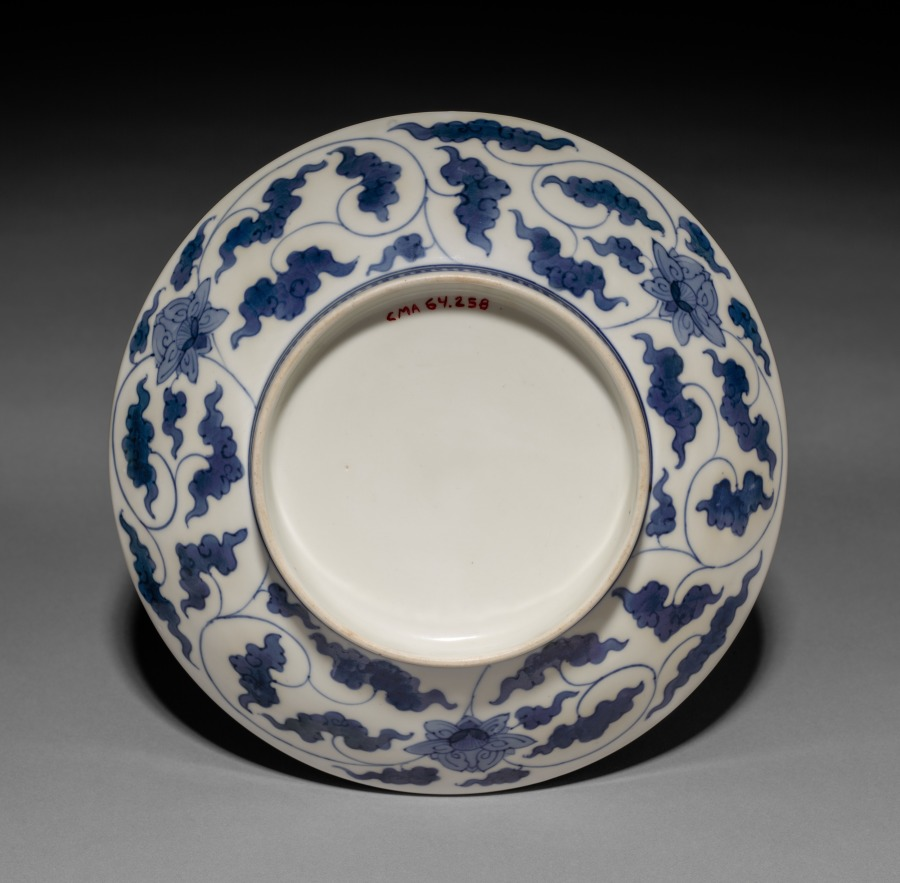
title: Dish with Lotus in Rui-Head-Shaped Cartouches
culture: Japan, Edo period (1615–1868)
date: mid-1800s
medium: Porcelain with underglaze blue and overglaze enamel (Hizen ware, Nabeshima type)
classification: Ceramic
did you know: A ruyi is a curved decorative object with a head like a cloud or lingzhi mushroom.